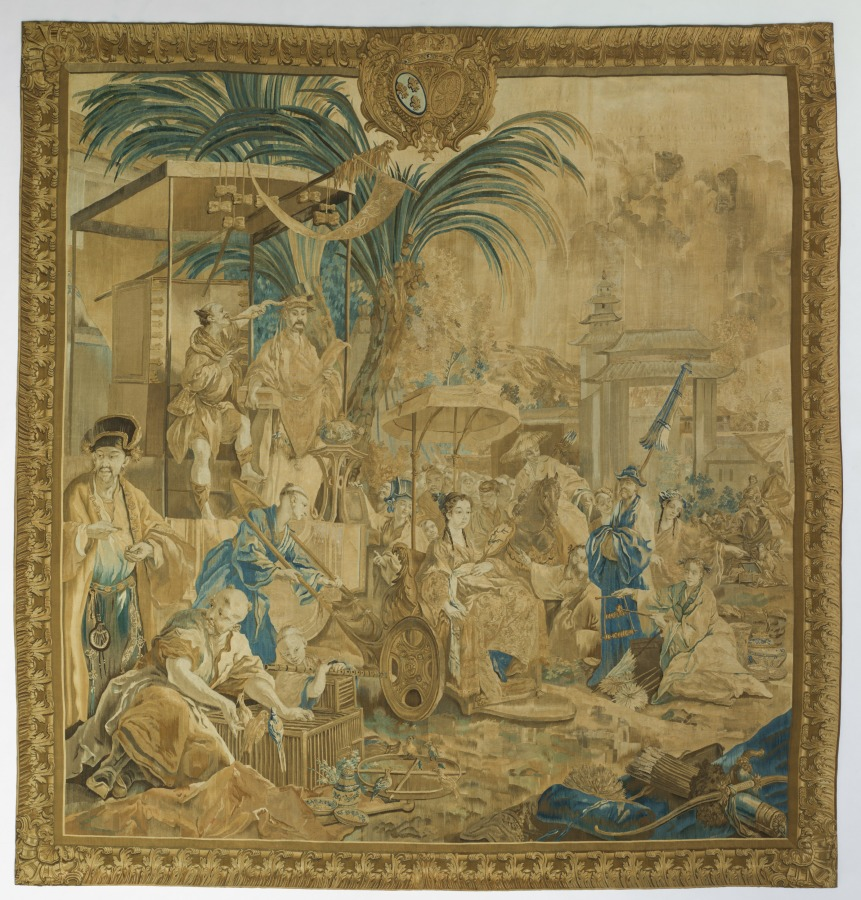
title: Chinese Fair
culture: France, 18th century, Period of Louis XV (1723-1774)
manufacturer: Beauvais (French)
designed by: Jean Joseph Dumons (French, 1687–1779)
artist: after a design by François Boucher (French, 1703–1770)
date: 1723–74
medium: tapestry weave: silk and wool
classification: Tapestry